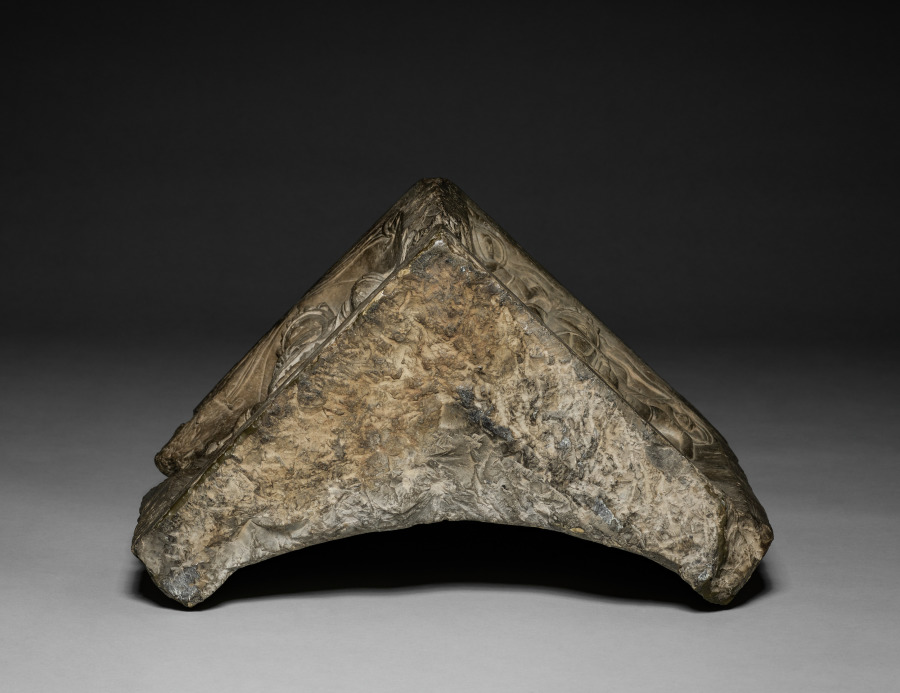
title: Corner Stone with Two Eleven-Headed Guanyin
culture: China, Tang dynasty (618-907)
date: c. 700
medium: stone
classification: Sculpture